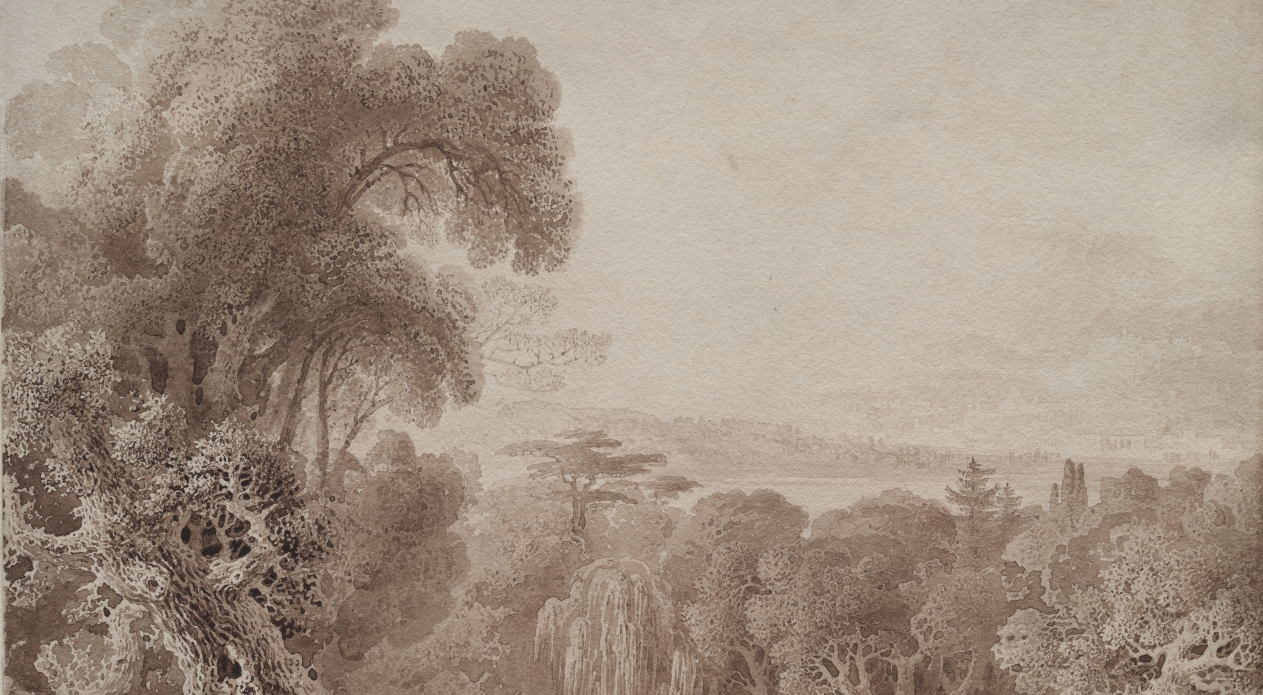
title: Figures Seated by a Lake in a Wooded Landscape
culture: England, 19th century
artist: John Martin (British, 1789–1854)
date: 1820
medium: brown wash and point of brush with graphite underdrawing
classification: Drawing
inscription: signed and dated, in brown ink, at lower right: J. Martin 1820; inscribed, in graphite, on verso, at center: William / No. 3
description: Before he became famous as a history painter, John Martin earned a living by teaching and painting watercolors. His so-called sepia drawings, landscapes in monochromatic wash, found an enthusiastic audience. The artist’s method for painting foliage in these drawings was idiosyncratic; form and texture were created almost entirely in negative spaces without the use of line. Highlighted leaves, bark, vines, and roots were delineated with the white of the paper, creating a peculiar, instantly recognizable, spongy effect.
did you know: John Martin's biographer believed that his early landscapes, such as this one, were inspired by classical texts by Ovid.